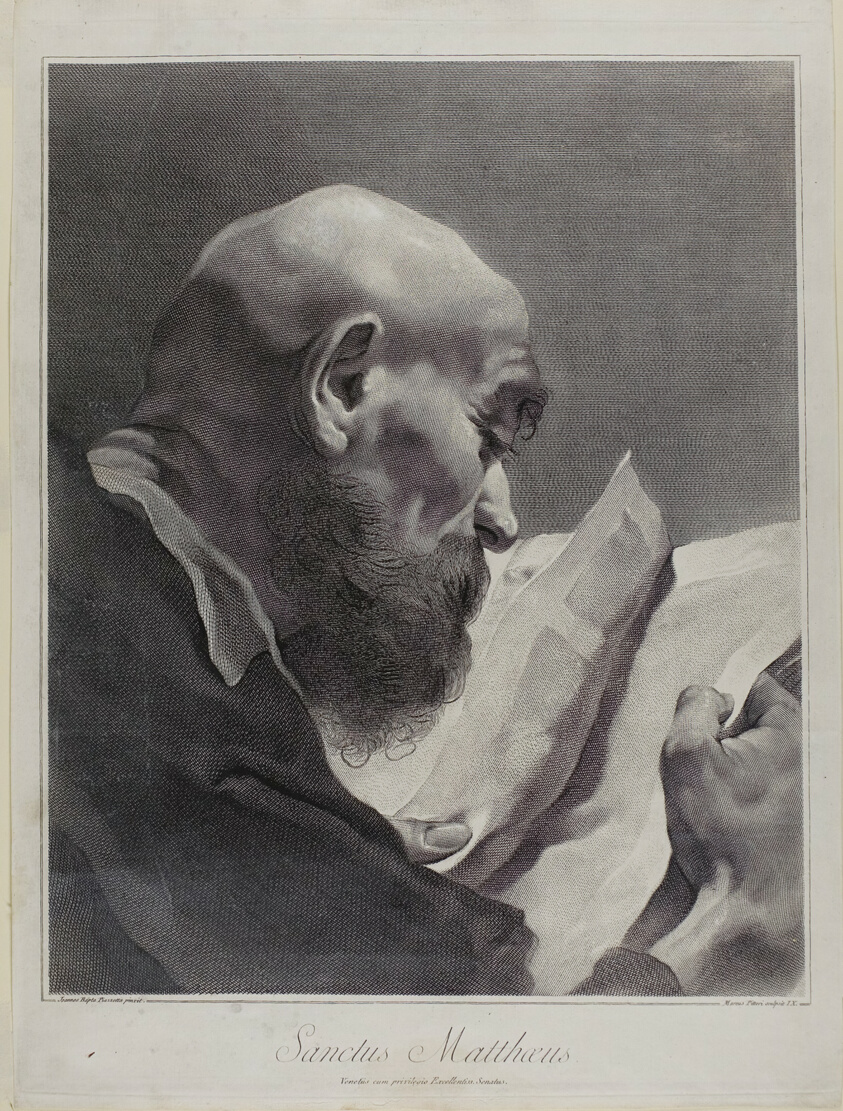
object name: Print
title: Saint Matthew, from The Holy Family and the Twelve Apostles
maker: Giovanni Marco Pitteri (Italian, 1702-1786); after Giovanni Battista Piazzetta (Italian, 1682-1754)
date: 1742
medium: Engraving in black on paper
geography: Italy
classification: engraving; print; prints and drawing